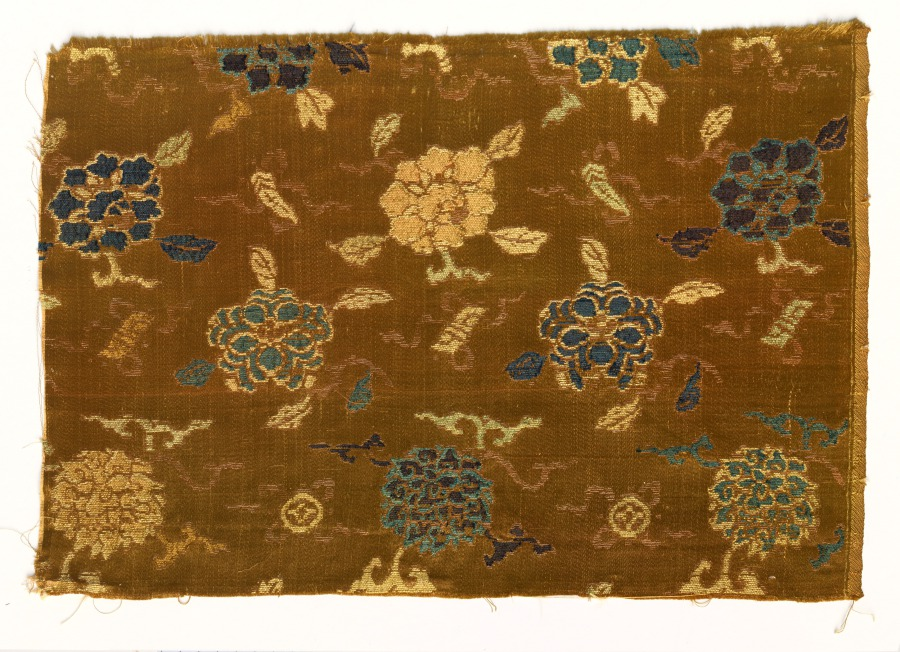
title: Textile Fragment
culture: Japan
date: 1800s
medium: silk, metallic thread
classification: Textile